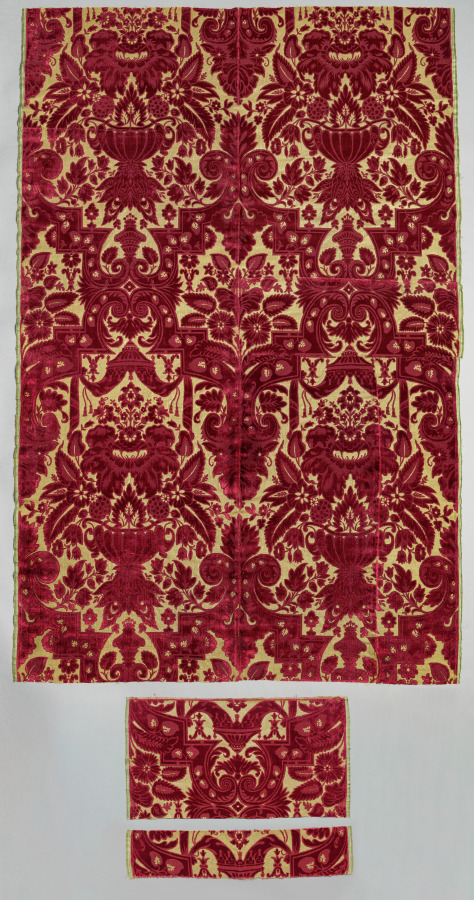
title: Velvet Fragments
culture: Italy, Genoa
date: 1600s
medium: velvet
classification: Velvet